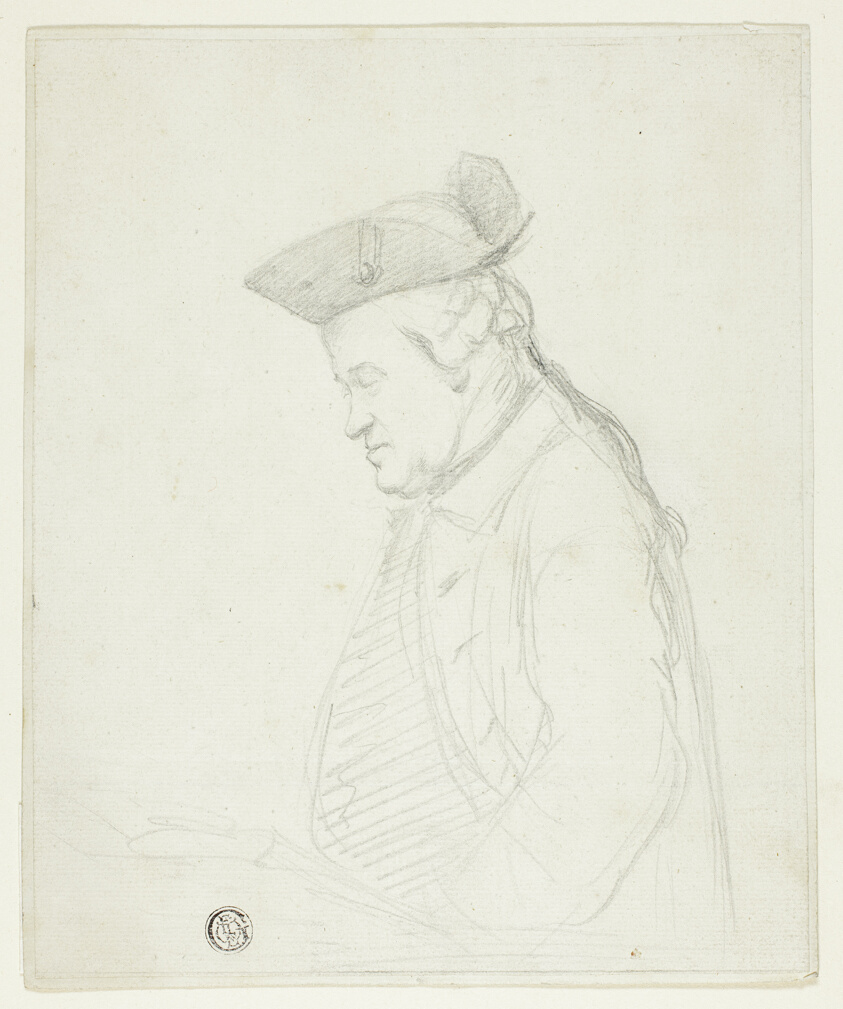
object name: Drawing and Watercolor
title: Half-Length Portrait of George Michael Moser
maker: Attributed to George Dance, II (English, 1741-1825); or George Michael Moser (English, c. 1704-1783)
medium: Graphite on ivory laid paper, laid down on ivory laid paper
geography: England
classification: graphite; drawings (visual works); prints and drawing